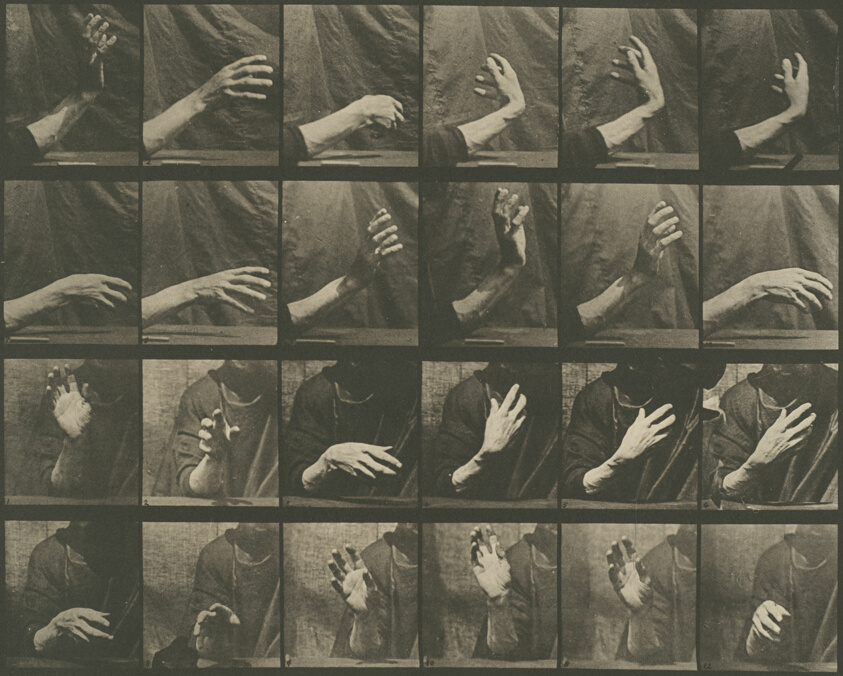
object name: Photograph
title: Animal Locomotion, Plate 535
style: 19th century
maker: Eadweard Muybridge (English, active United States, 1830–1904)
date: 1887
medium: Collotype, from "Animal Locomotion"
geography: England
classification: photograph; collotype; photography